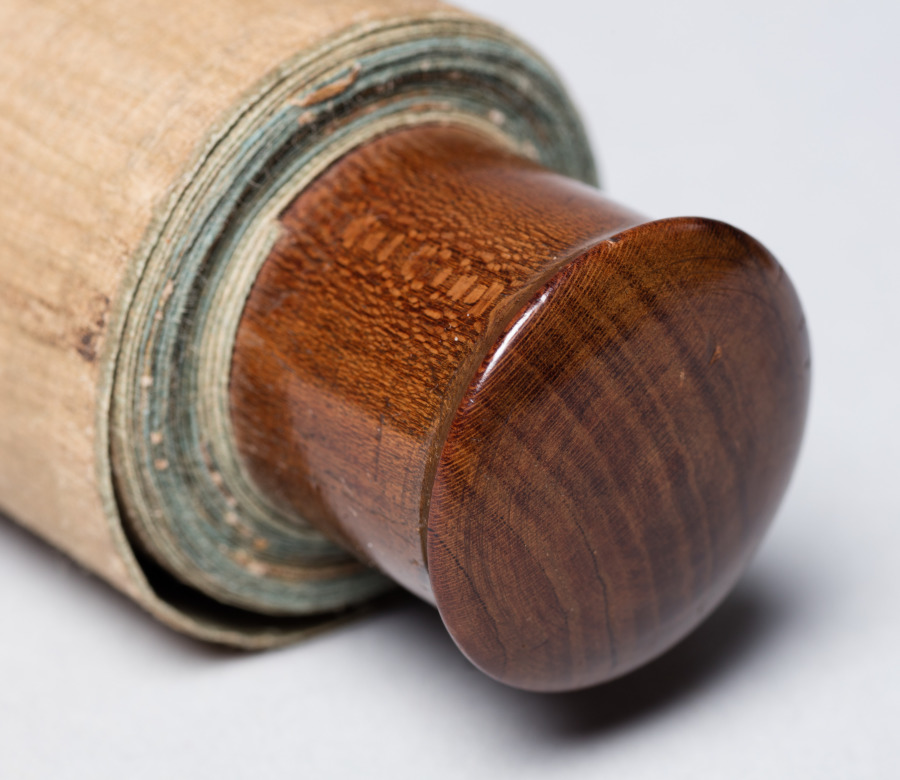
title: Reflections of Priest Foyen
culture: Japan, Muromachi period (1392–1573)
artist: Ikkyū Sōjun (Japanese, 1394–1481)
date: 1400s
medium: hanging scroll, ink on paper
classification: Painting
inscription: signed: "Kido nanasei son, Ikkyūshi Sōjun sho (Written by Ikkyū Sōjun, the seventh generation of Kido)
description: Left by his mother at a small Zen temple in Kyoto at the age of six, Ikkyu later drew on his early studies and experiences for his writings, which focused on his keen interest in the Chinese classics. Poetry in particular was a favorite subject and images from classical poetry or passages from favorite poems or commentaries frequently provided Ikkyu with the core ideas for his own work. A rare example of his calligraphy, this narrow scroll contains a verse in eight phrases, each comprising four characters. The whole verse is organized in three towering lines of brusque, emphatic calligraphy augmented by Ikkyu's signature-the two lines of running script in the lower left corner. The text refers to a passage included in the Chronicle of the Zen Sect that contains a cautionary reminder attributed to the legendary Chinese monk Foyen Qingyuan (1067-1120), long revered in Japan. The initial phrase begins: "Life is a mirage."